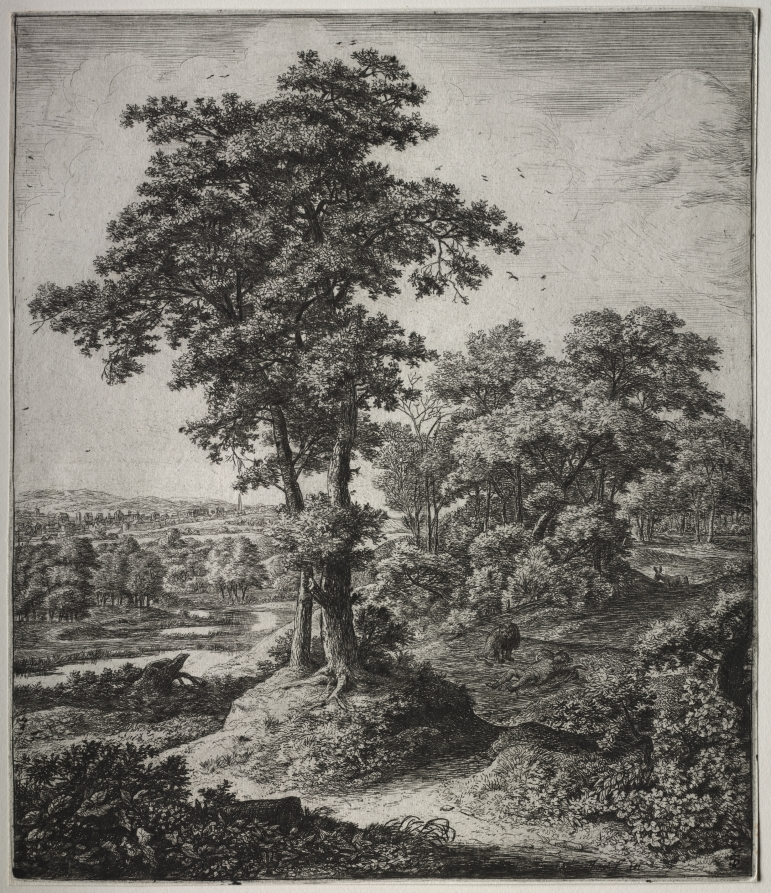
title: Six large upright landscapes with scenes from the Old Testament: The Unfaithful Prophet of Judah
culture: Netherlands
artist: Anthonie Waterloo (Dutch, 1609/10–1690)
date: 1640–90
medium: etching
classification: Print